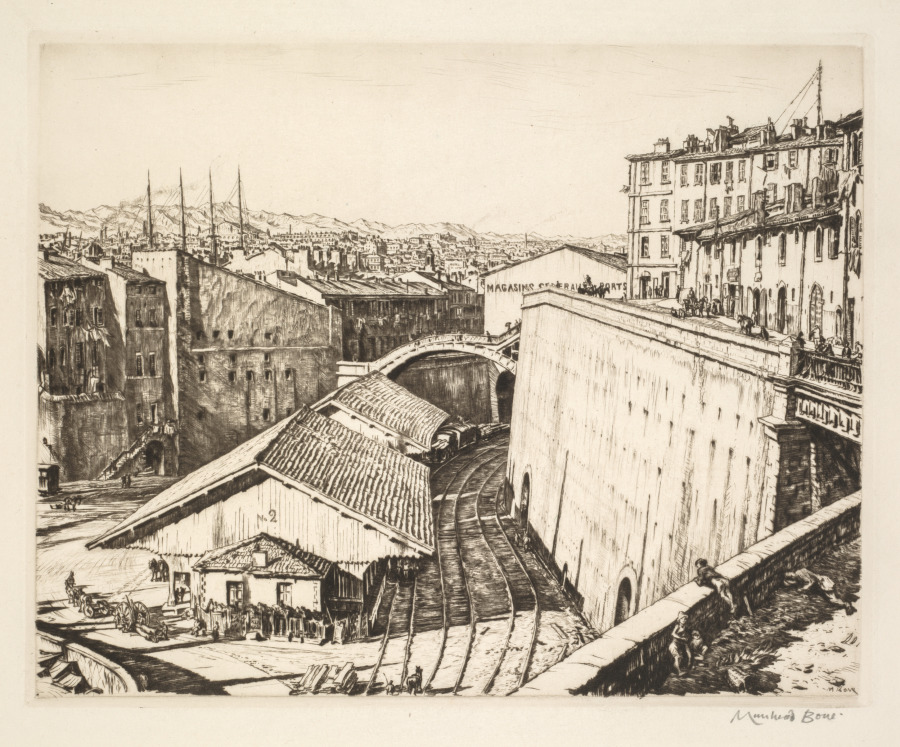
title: Railway Sheds, Marseilles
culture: Britain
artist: Muirhead Bone (British, 1876–1953)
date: 1937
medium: Drypoint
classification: Print